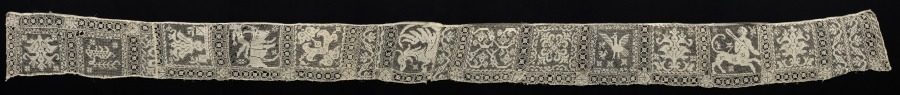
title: Band with Various Fantastic Creatures and Vegetal Patterns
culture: Italy, 1800s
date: 1800s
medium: Bleached linen (est.): needle lace, filet/lacis (knotted ground and darned in two directions)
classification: Lace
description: The reversed and backward orientation of many of the squares in this band of lace suggests that this was not their original layout. They were most likely taken apart and later joined back together in a disoriented manner.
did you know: The square showing a man in midair above a bull-like creature is reminiscent of the Minoan "Bull Leaping" fresco at the Knossos palace complex.